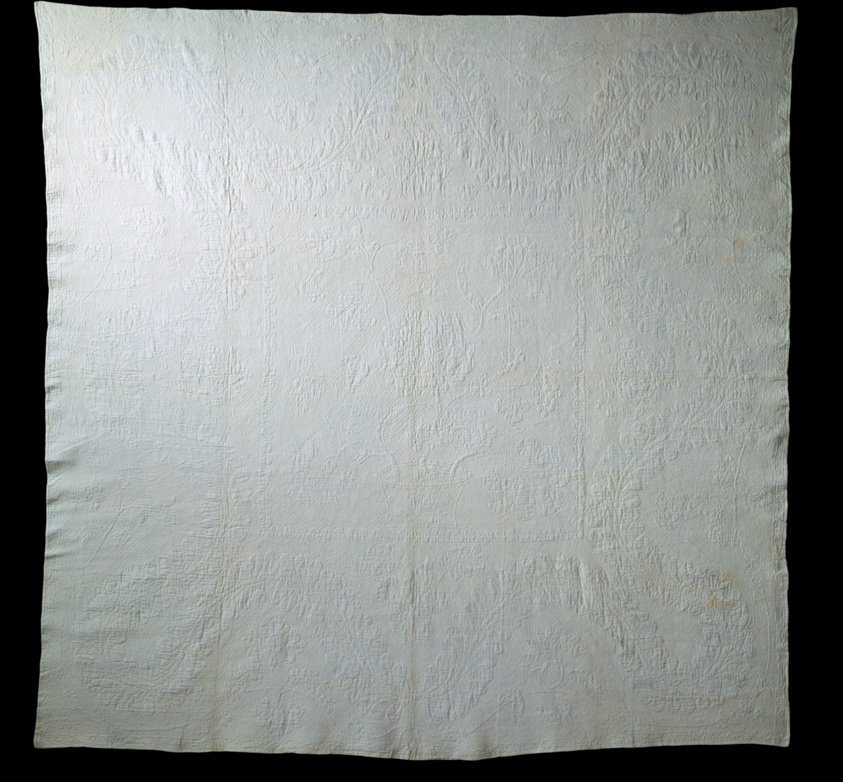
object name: Textile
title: Bedcover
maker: Hannah (née Hastings) Howard (American, 1770-1833); United States, Delaware, probably Wilmington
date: 1800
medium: Cotton, plain weave, quilted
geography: United States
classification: needlework - quilt; textile